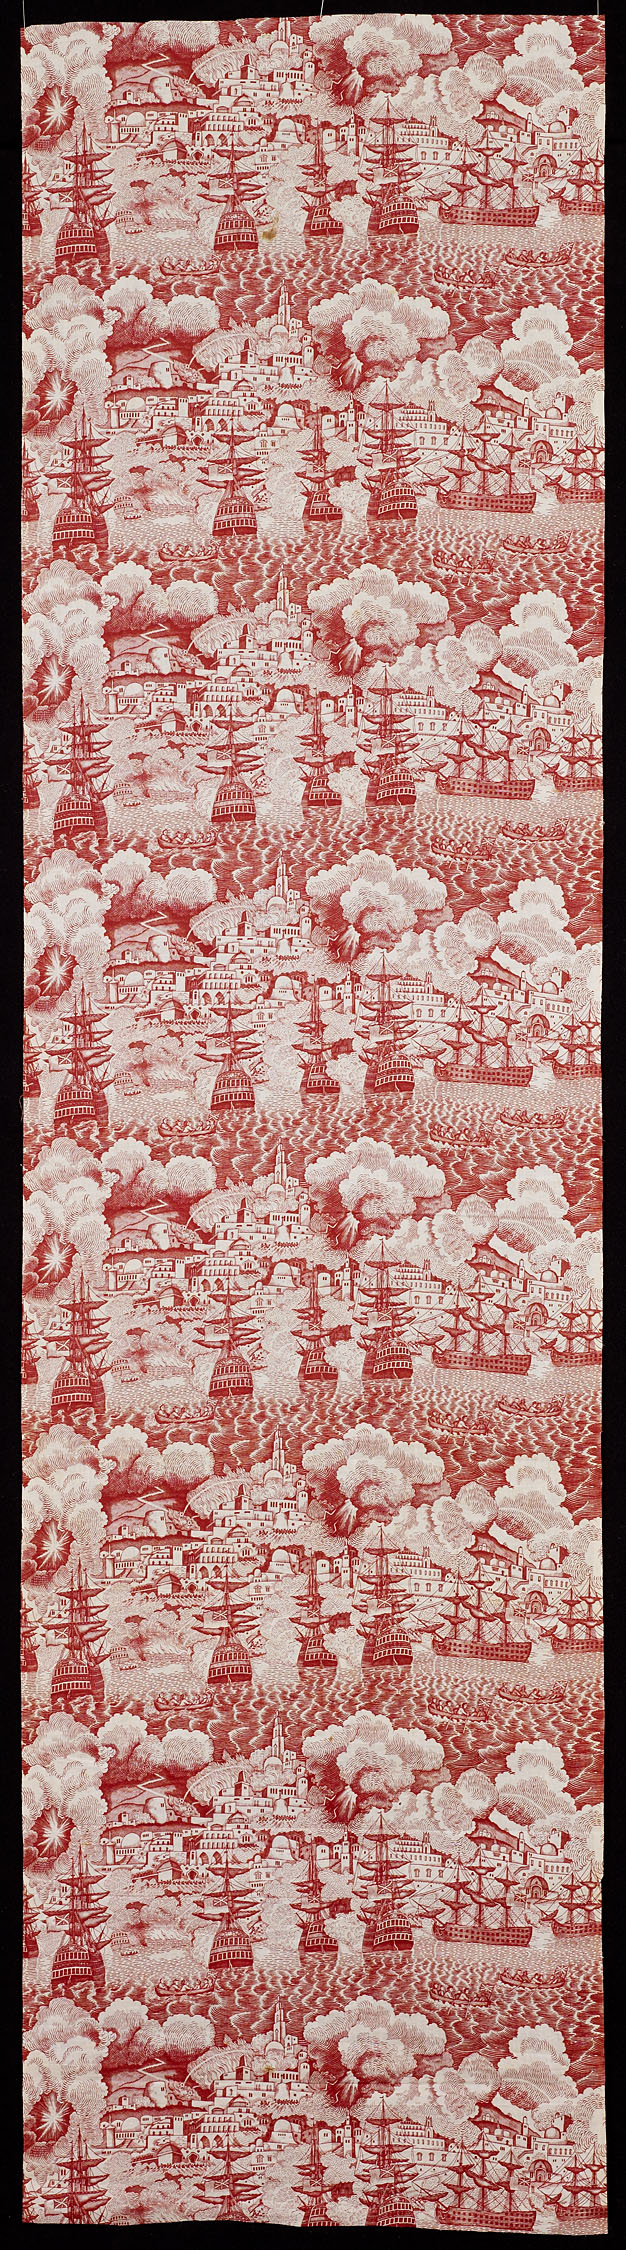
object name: Textile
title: "The Bombardment of Algiers" (Furnishing Fabric)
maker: England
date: After 1816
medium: Cotton, plain weave; roller printed; glazed and calenderized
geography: England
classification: textile; weaving - printed; furnishing textile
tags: propaganda, war, boats